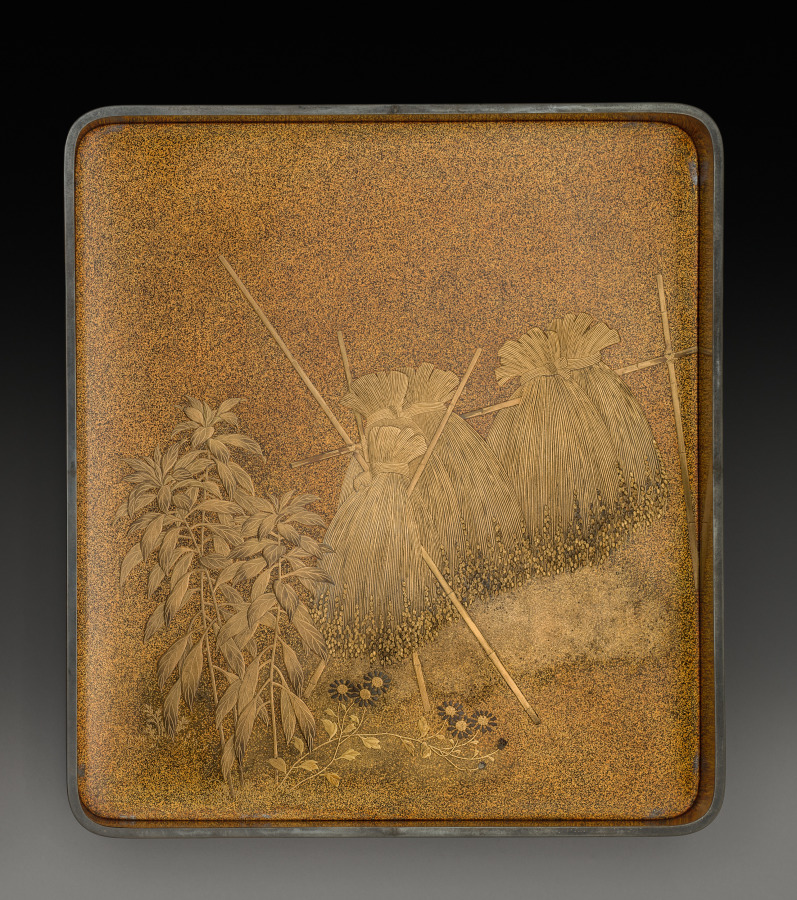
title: Lid of Writing Box (Suzuribako) with Chrysanthemum and Plum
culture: Japan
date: late 1800s-early 1900s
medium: Lacquer over wood with gold and silver sprinkled powder (maki-e)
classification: Lacquer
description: Both functional and elegant, this is a container for an ink stone, brushes, and ink from a set of writing tools that included a larger box for paper. Against a sleek gold lacquered ground, its artist has used restraint in sprinkled powder decoration (maki-e) to produce the design of cockscomb and harvested rice on the interior of the lid.